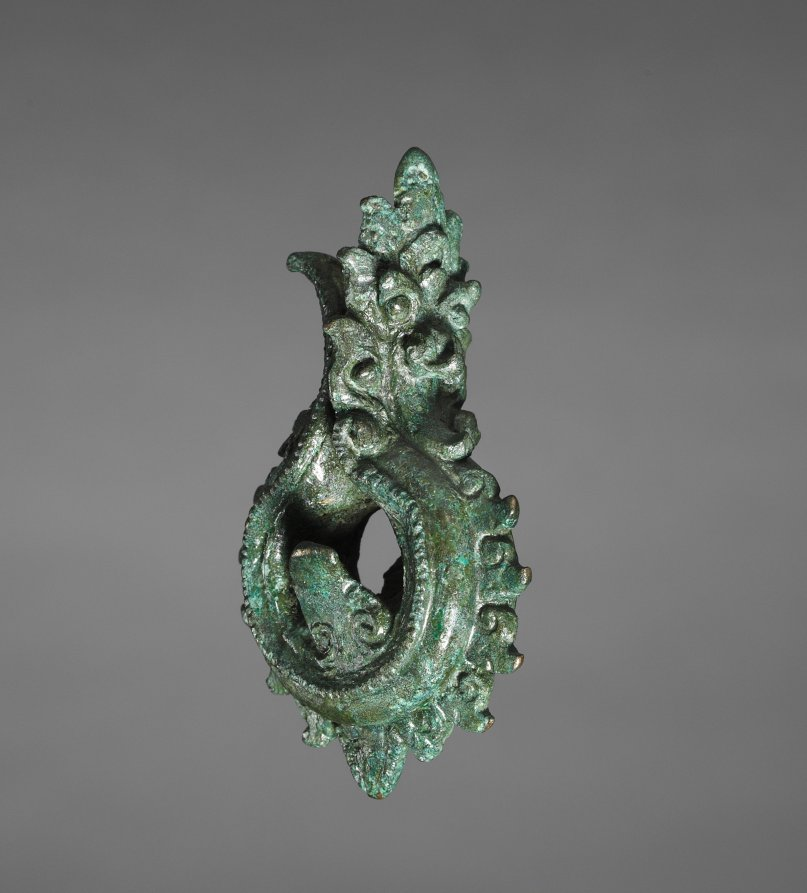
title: Earring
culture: Cambodia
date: 1200s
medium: bronze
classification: Jewelry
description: This earring is in the form of naga, or water serpent, one of the most popular decorative motifs in Cambodian art. While bronze objects such as furniture and palanquin fittings and finials, hooks, rings, etc., were among the most typical items of the classical Angkorean art (12th–13th century), jewelry is very rare. Originally, it must have been gilt. It is conceivable that this earring may not have been used as a regular ear ornament but enhanced a Khmer sculpture, a common practice, which would explain their heavy weight and large size.